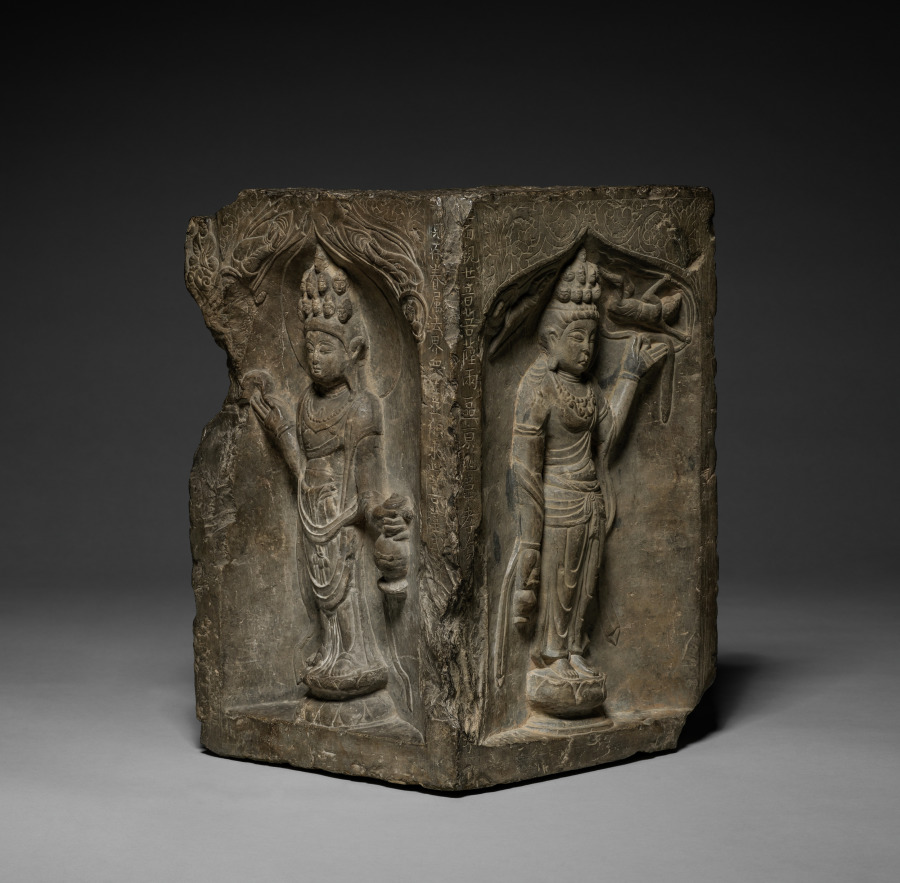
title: Corner Stone with Two Eleven-Headed Guanyin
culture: China, Tang dynasty (618-907)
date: c. 700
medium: stone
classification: Sculpture